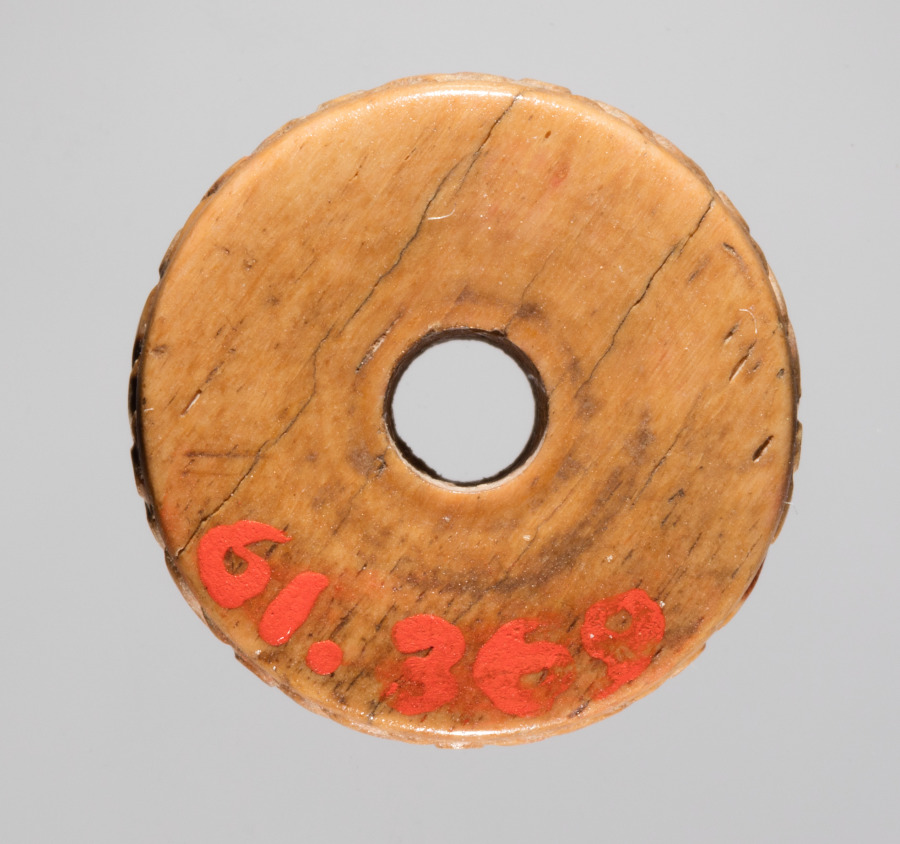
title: Spindle Whorl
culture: Iran, early Islamic period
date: 700s - 900s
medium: bone, incised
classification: Spindle Whorl